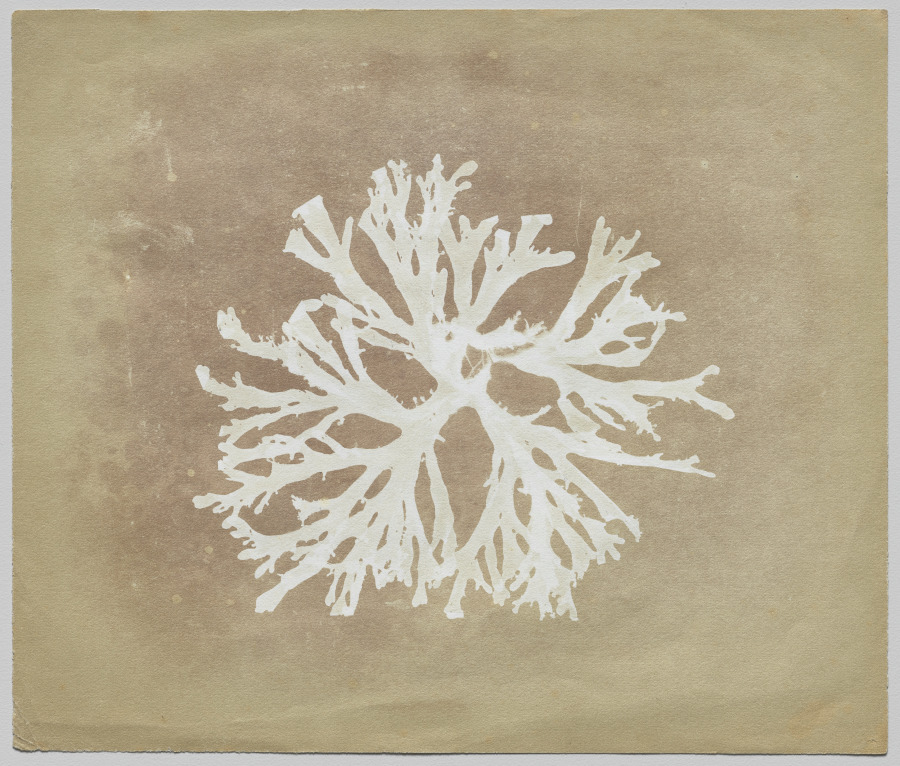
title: Algae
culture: England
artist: circle of William Henry Fox Talbot (British, 1800–1877)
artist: Calvert Richard Jones (British, 1804–1877)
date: c. 1840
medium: Salted paper photographic drawing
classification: Photograph